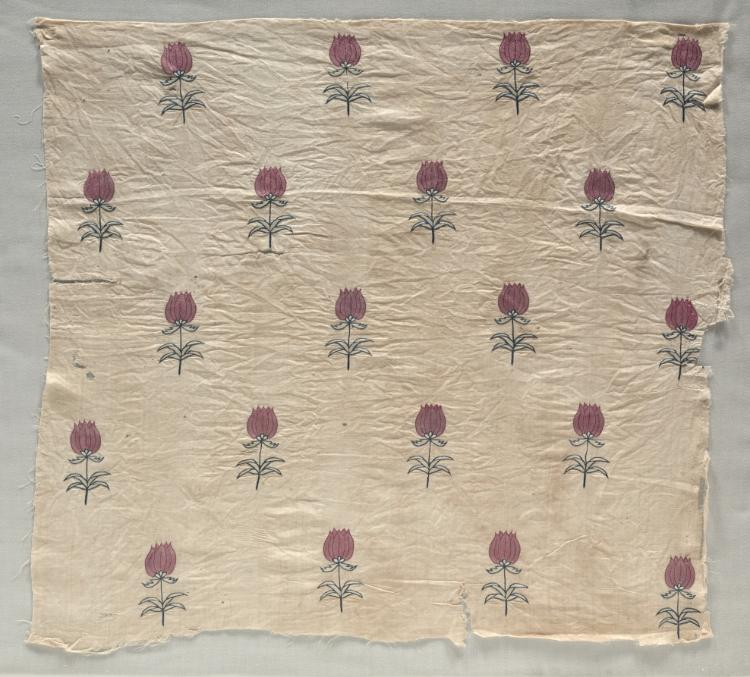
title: Fragment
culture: India, Jaipur ?, 18th century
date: 1700s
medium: embroidery; silk on linen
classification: Embroidery